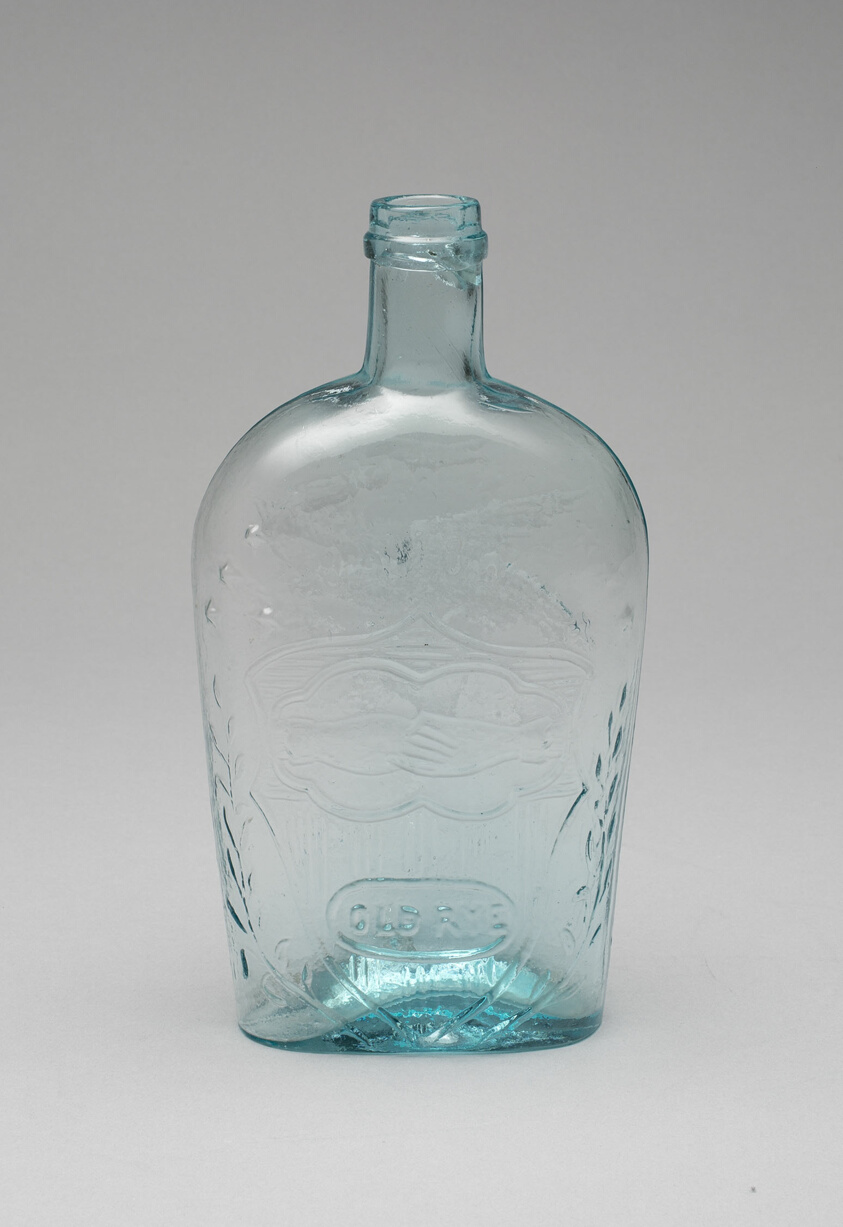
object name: Glass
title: Flask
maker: Alexander Chambers (American, 1819–1875) and/or David H. Chambers (American, 1822–1862); A. & D. H. Chambers (American, 1841–1889); Pittsburgh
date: 1860–c. 1884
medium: Glass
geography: Pittsburgh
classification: flask (bottle); glass; american decorative arts; american arts; decorative arts